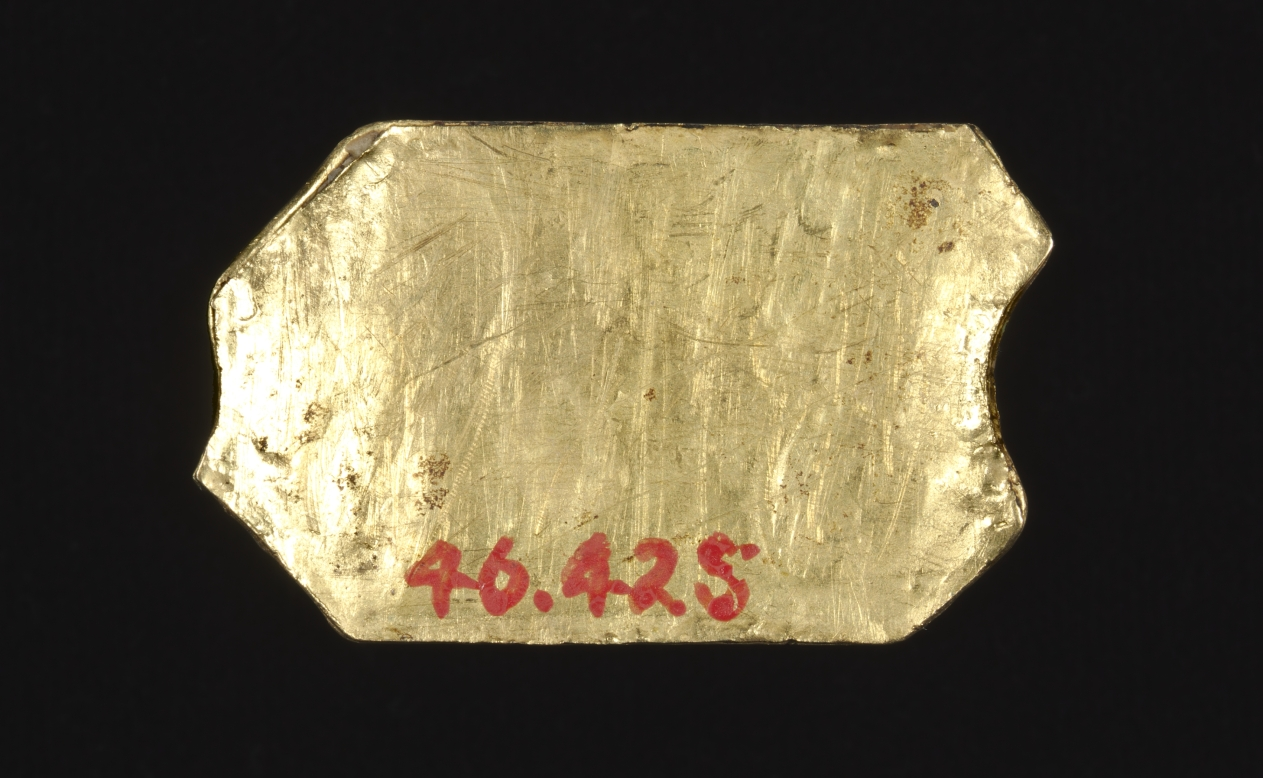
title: Plaque (Appliqué)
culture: Spain (Hispano-Moresque), 14th century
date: 1300s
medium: translucent enamel on gold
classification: Enamel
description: This oblong plaque is decorated with pseudo-Kufic (fake Arabic) designs indicating that it was produced in Spain under Muslim influence. It may have served as an applied ornament to some article of personal adornment such as a belt. It is possible that the design was inspired by Arabic coinage.